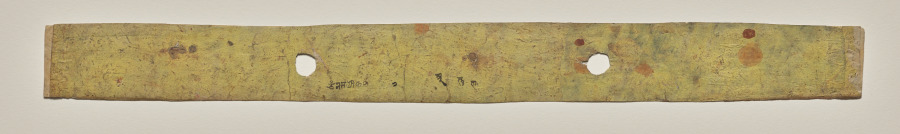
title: Folio 1 (recto), from a Manuscript of the Perfection of Wisdom in Eight Thousand Lines (Ashtasahasrika Prajnaparamita-sutra)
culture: Eastern India, Bihar, Vikramashila Monastery. Paper: Nepal, Kathmandu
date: Sunday, September 14, 1119 (year 239 of the Newar Samvat in the month of Ashvina)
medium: Palm leaf backed with yellow paper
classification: Painting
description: Sometime between the sixteenth and nineteenth centuries, Nepalese paper known as lokta, made from the bark of high-elevation evergreen shrubs, was pasted to the first folio of this manuscript in order to prevent the delicate palm-leaf page from further deteriorating. Mantra syllables of invocation are written hastily in black ink. Like the Nepalese numbers found throughout the rest of the manuscript, the yellow paper is another indication that the Manuscript of the Perfection of Wisdom in Eight Thousand Lines was held in a Nepalese monastery after being copied in eastern India.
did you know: Yellow Nepalese paper functions as an insect-deterrent.